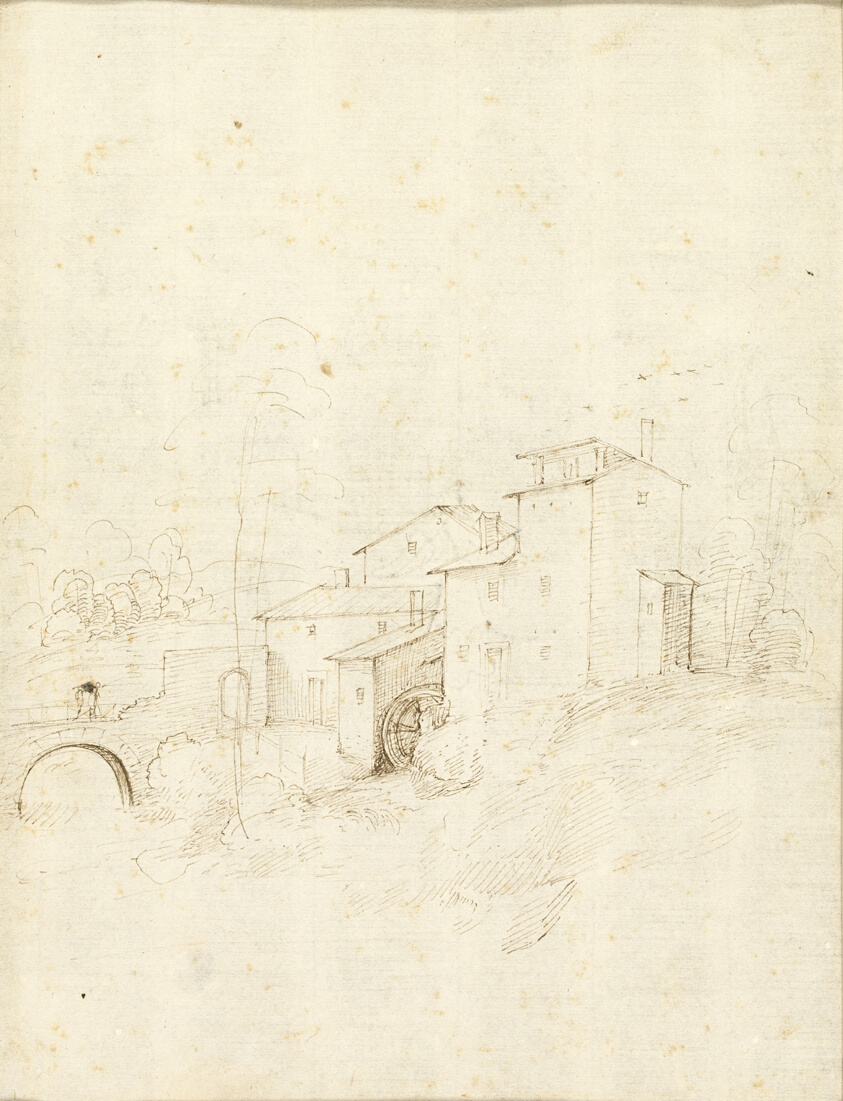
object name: Drawing and Watercolor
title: Watermill with Figures on an Arched Bridge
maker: Baccio della Porta, called Fra Bartolommeo; Italian, 1472-1517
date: 1508/09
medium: Pen and brown ink on ivory laid paper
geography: Italy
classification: drawings (visual works); prints and drawing